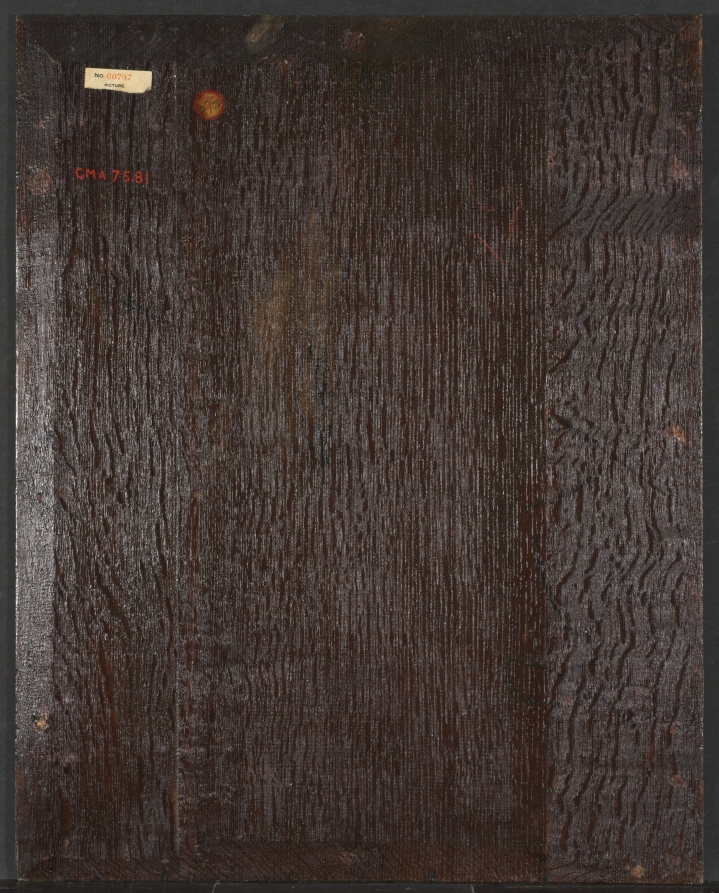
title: Portrait of Elizabeth Spiegel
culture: Netherlands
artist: Dirck Dircksz. Santvoort (Dutch, 1610/11–1680)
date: 1639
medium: oil on wood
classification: Painting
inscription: Inscribed on back: "Elisabet Spiegel"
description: This painting belongs to a series of portraits representing the five senses and each depicting a daughter of a wealthy family from Amsterdam. This portrait of 11-year-old Elizabeth Spiegel, who holds a recorder in her hands, represents the sense of hearing. Her gown of costly satin and pearl ornaments proclaims her family's prosperity, and the imported ostrich feathers from Africa indicate Amsterdam's role as an international trade center.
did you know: Amsterdam was a very important trade center when this portrait was painted in the mid-1600s. In this portrait, the girl wears an African ostrich feather in her hair and her skin appears to glow. Look closely at the way her small hands were treated and the naturalistic way they grip the musical instrument.